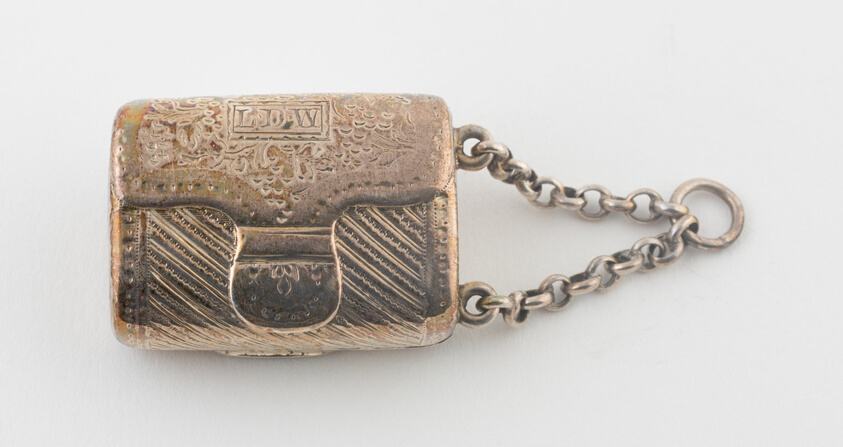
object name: Metalwork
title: Purse-Shaped Vinaigrette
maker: William Eliott (London, England)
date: 1815/16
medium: Silver and silver gilt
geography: London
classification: container for personal use; vinaigrette (container for health care); european decorative arts; metalwork; silver; decorative object/ornament